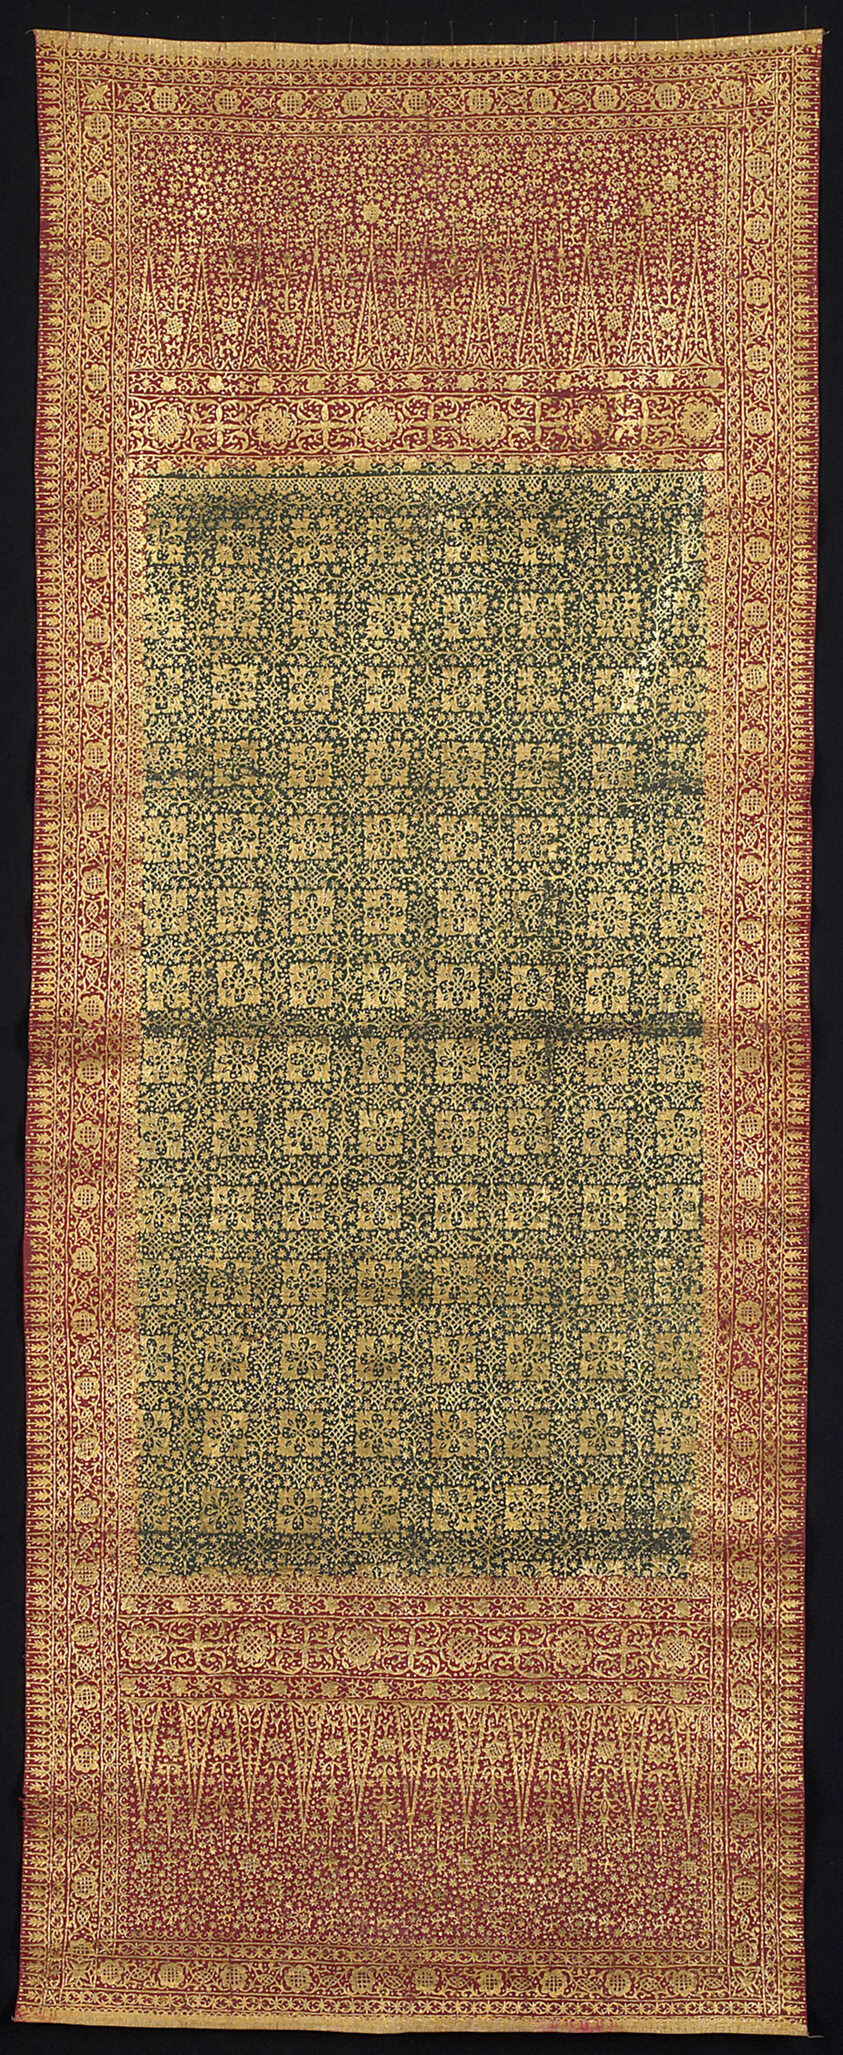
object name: Textile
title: Shoulder Cloth (kain parada)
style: indonesian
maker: Indonesia, Sumatra, Jambi province or Palembang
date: 19th century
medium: Cotton, plain weave; hand-drawn resist dyed (batik tulis); hand painted adhesive with applied gold leaf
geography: Indonesia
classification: textile; weaving - printed